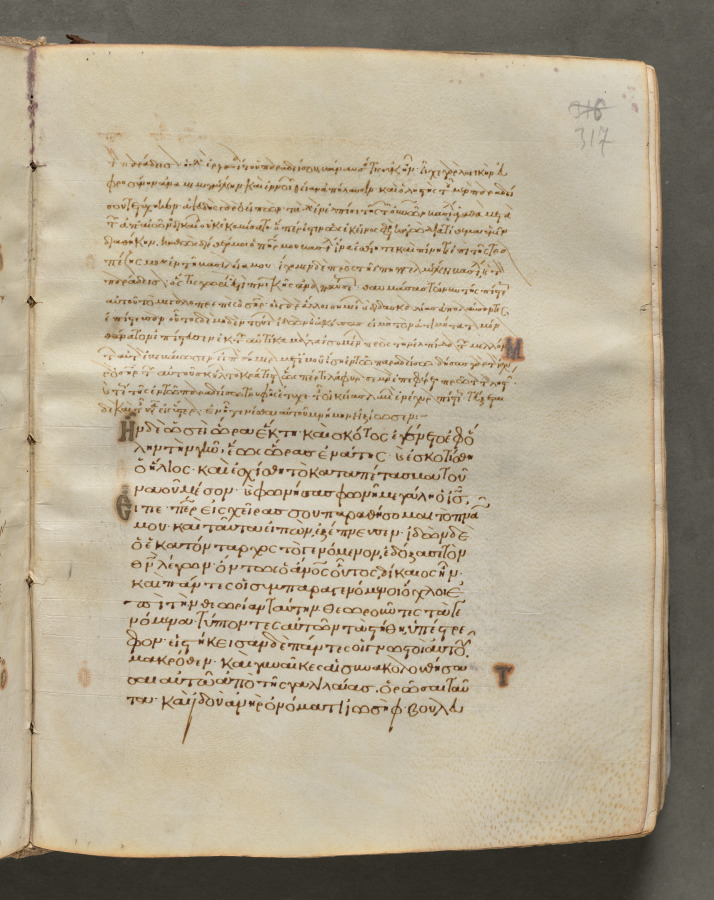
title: Text, folio 317 (recto), from a Gospel Book with Commentaries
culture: Byzantium, Constantinople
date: c. 1000–1100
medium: ink, tempera, and gold on vellum; leather binding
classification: Bound Volume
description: Each of the four gospels in this book opens on a page with brilliantly illuminated borders depicting the author of the text as well as birds—principally peacocks, symbols of the immortality of the soul—and fountains, representing the fountain of life and the salvation of the soul. This volume consists of 428 leaves with texts in Greek. Its level of sophistication suggests that it was probably written and decorated in a monastery in Constantinople.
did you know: Gospel books were carried in procession through Byzantine churches.